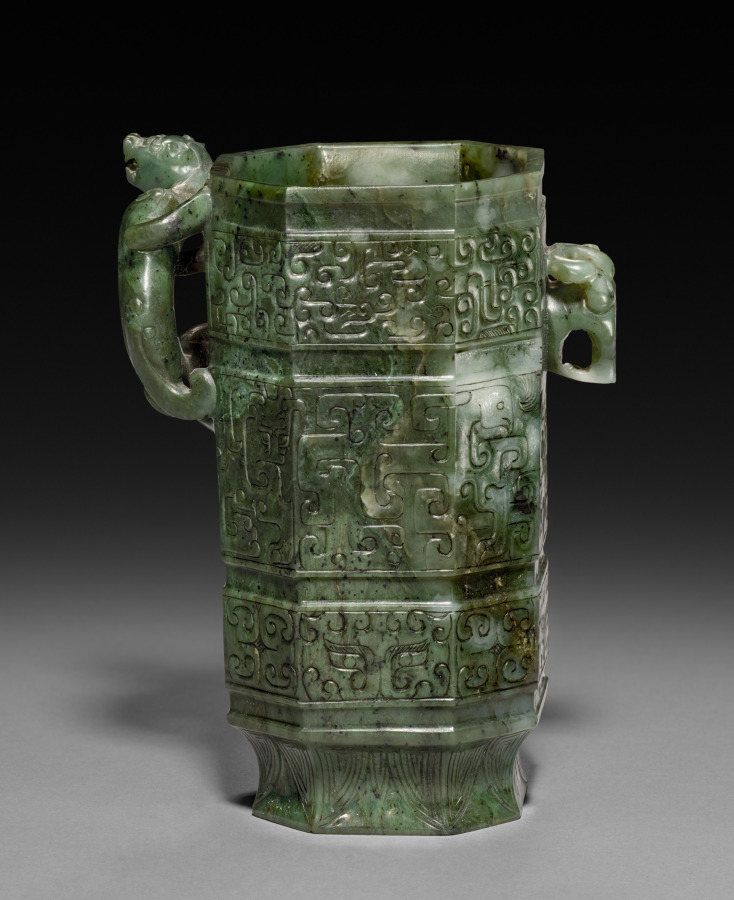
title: Octagonal Ewer with Dragon Handle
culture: China, Qing dynasty (1644–1911), Qianlong reign (1736–95)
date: 1736–95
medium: jade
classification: Jade